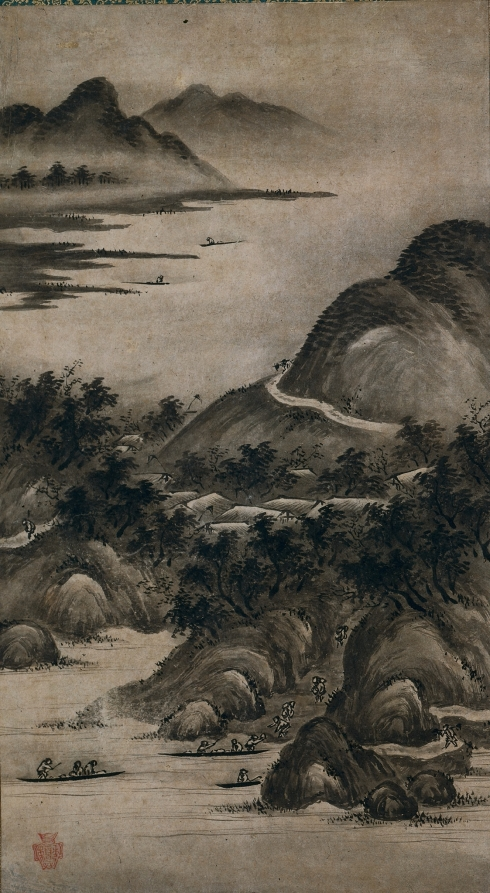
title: Seasonal Landscapes: Autumn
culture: Japan, Muromachi period (1392–1573)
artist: Kano Hideyori (Japanese, active mid- to late 1500s)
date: mid- to late 1500s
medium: hanging scroll, ink on paper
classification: Painting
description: Now comprising three scrolls, this composition was originally a set of four paintings depicting the seasons. The set is among the most important of the artist’s surviving works. Each painting was executed in the gyō mode, indicating a speedy brush with rounded strokes. The terms shin (formal), sō (cursive), and gyō (semicursive), borrowed from calligraphy terminology, are terms commonly used by connoisseurs to describe brushwork in ink paintings.